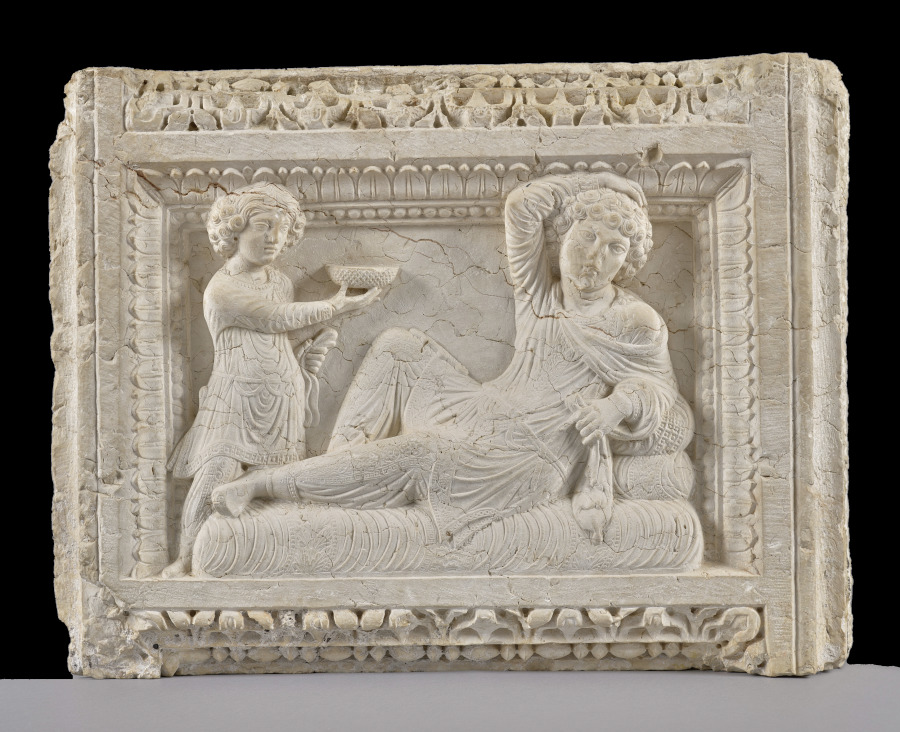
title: Tomb Relief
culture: Syria, Palmyra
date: 230 CE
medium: limestone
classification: Sculpture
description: Although its findspot is unknown, this high relief almost certainly once sealed a burial niche of a mausoleum at Palmyra. It illustrates a blending of Roman and Parthian artistic traditions. Set within a sumptuous border of beads and leaves, a wealthy man awakens on a luxuriously cushioned bed as his attendant offers him a wine bowl decorated with crosshatchings. Both are dressed according to Parthian custom, wearing pants and pleated tunics, but the man’s languid pose is taken from classical prototypes. The subject is a variant of a formulaic funerary banquet scene in which proffered wine welcomes the deceased into a well-appointed afterlife.